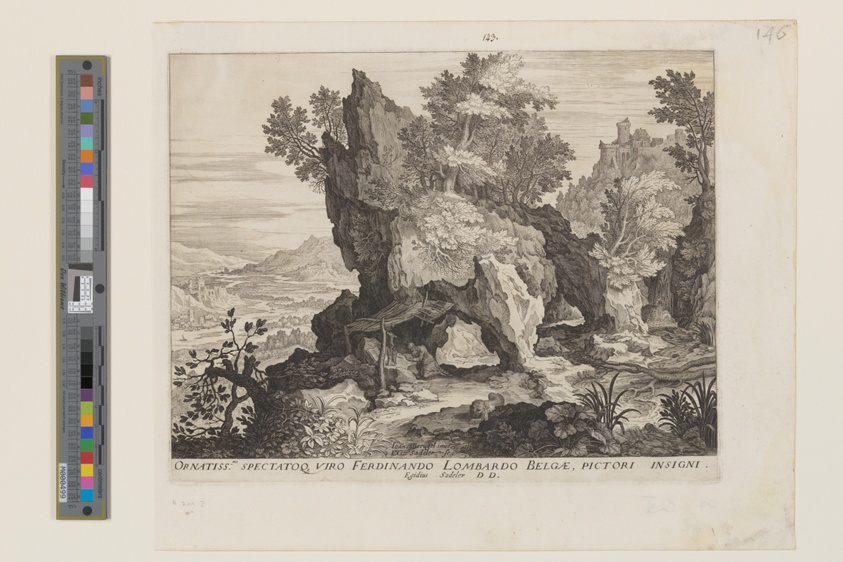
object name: Print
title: Rocky Landscape with St. Jerome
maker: Aegidius Sadeler II (Flemish, c. 1570–1629); after Jan Brueghel the Elder (Flemish, 1568–1625)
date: c. 1590-1620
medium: Engraving on ivory laid paper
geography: Flanders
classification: print; paper; prints and drawing; engraving